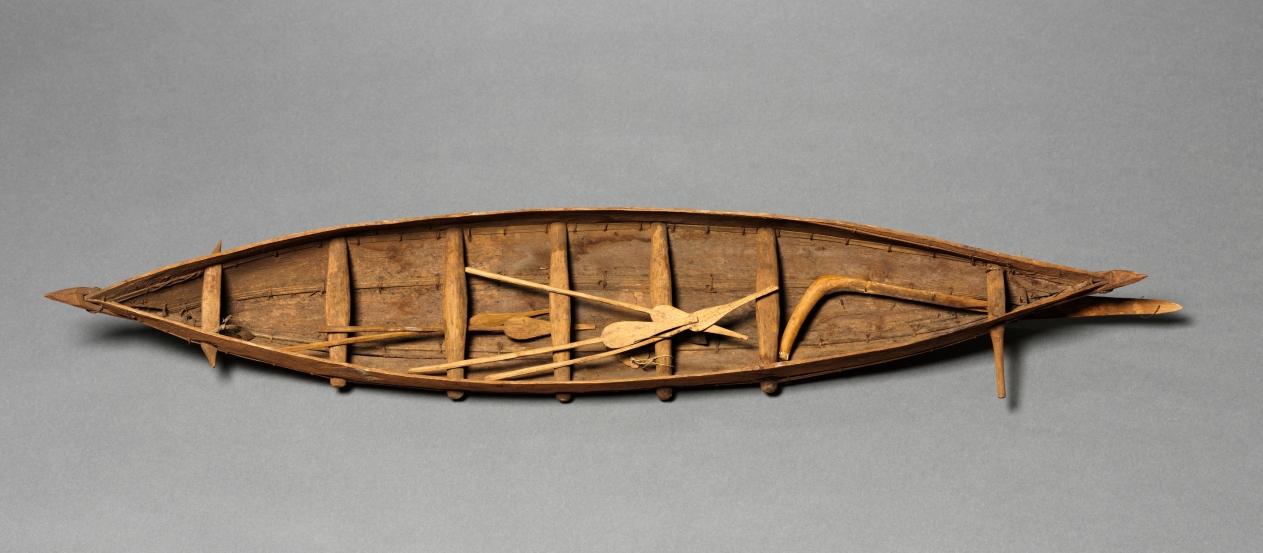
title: Model Canoe and Paddles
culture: Africa, East Africa, probably Uganda, unknown maker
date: 1900s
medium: wood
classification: Furniture and woodwork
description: Made of plain wood, this is a model of a canoe with a prow, seats, and five paddles. Composed of multiple panels sewn together with fibers, it was described in historical museum documents as a "war canoe." Similar examples from around the same period are found in American and European museums, where they had been collected in eastern, central, and western Africa as anthropological artifacts rather than as artworks. While the archives have little information about this object, it appears similar to Ugandan sewn plank canoes and to a model example collected in Uganda between 1890 and 1910 now at the British Museum.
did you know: The small scale and a 1929 description of this object as "modern" suggest it was made for tourists.